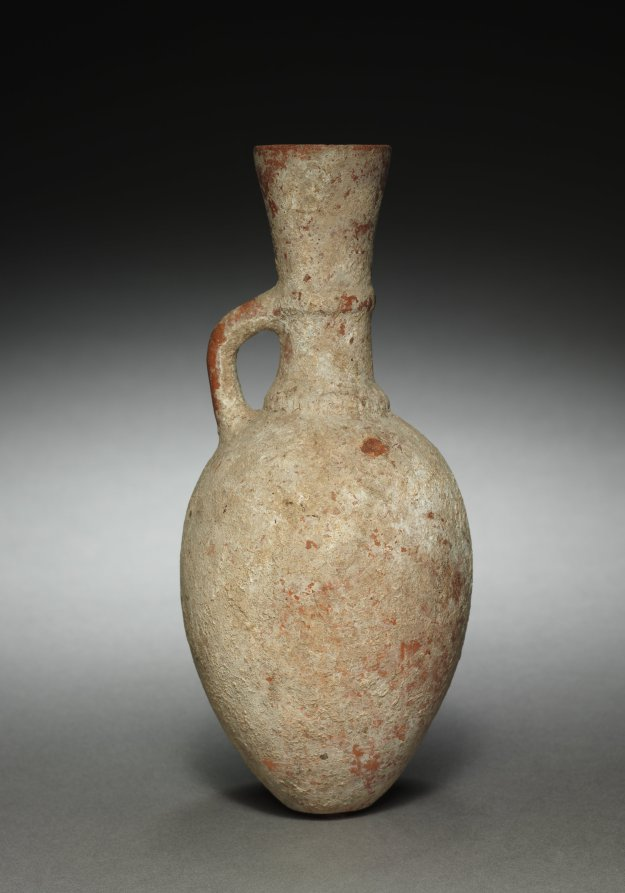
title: Jug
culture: Iran, Amlash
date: c. 1000 BCE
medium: terracotta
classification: Ceramic